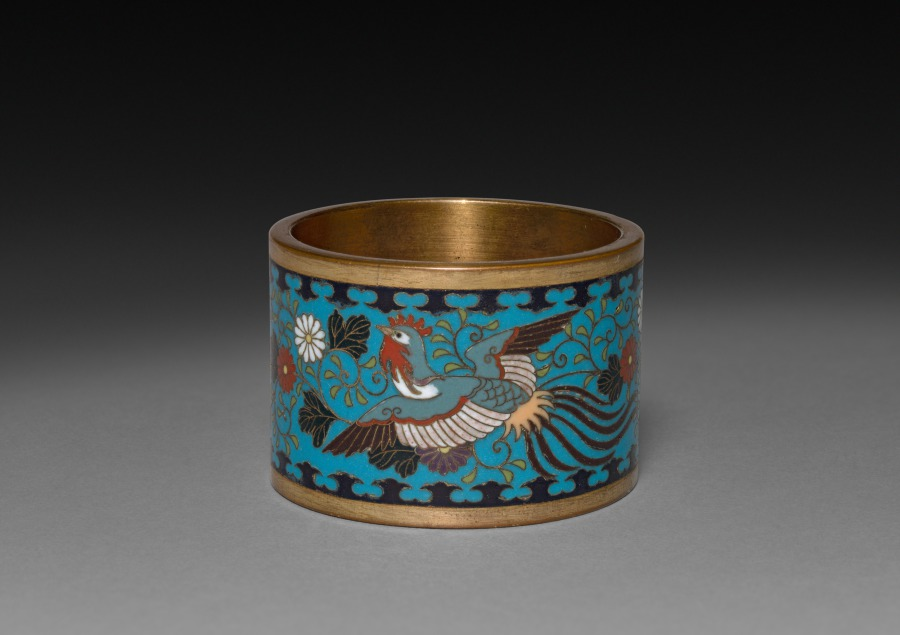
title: Napkin Ring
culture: Japan, Meiji period (1868–1912) to Taishō period (1912–26)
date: early 1900s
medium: One of a pair; cloisonne enamel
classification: Enamel